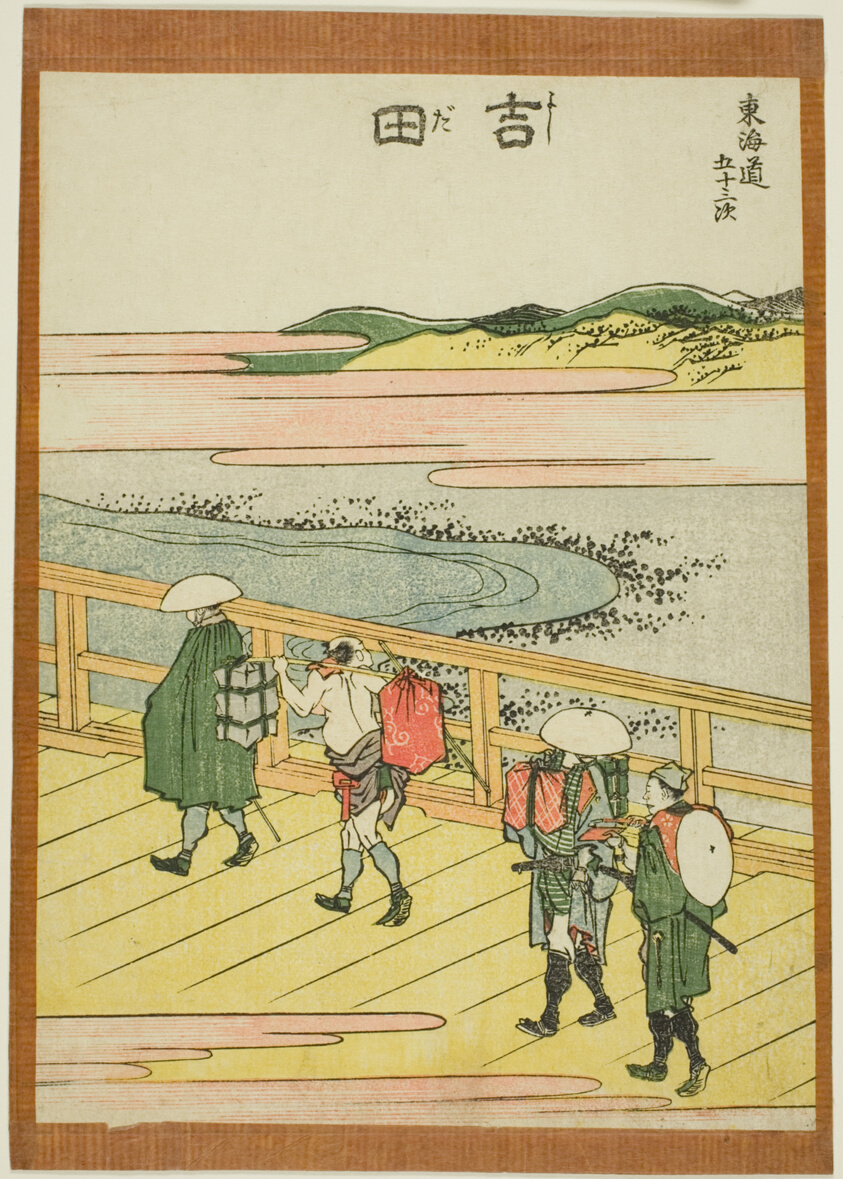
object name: Print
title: Yoshida, from the series "Fifty-three Stations of the Tokaido (Tokaido gojusan tsugi)"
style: Japanese (culture or style)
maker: Katsushika Hokusai 葛飾 北斎; Japanese, 1760-1849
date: c. 1806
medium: Color woodblock print; chuban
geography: Japan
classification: woodblock print; print; asian art